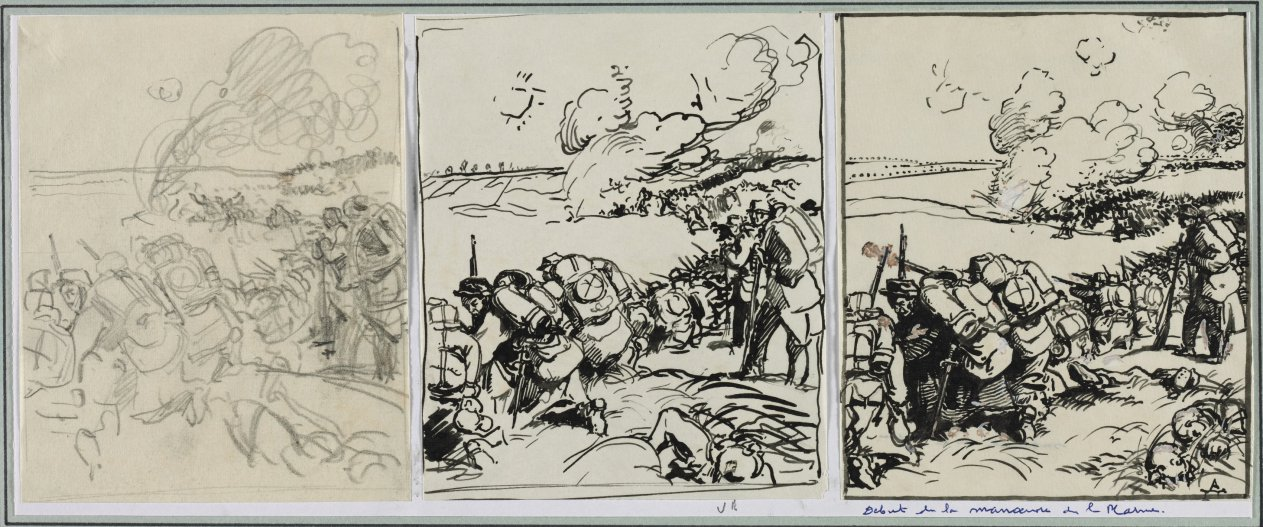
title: Dêbut de la manoeuvre de la Marne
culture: France, 20th century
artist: Auguste Louis Lepère (French, 1849–1918)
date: 1914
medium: brush and black ink and brown and white heightening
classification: Drawing